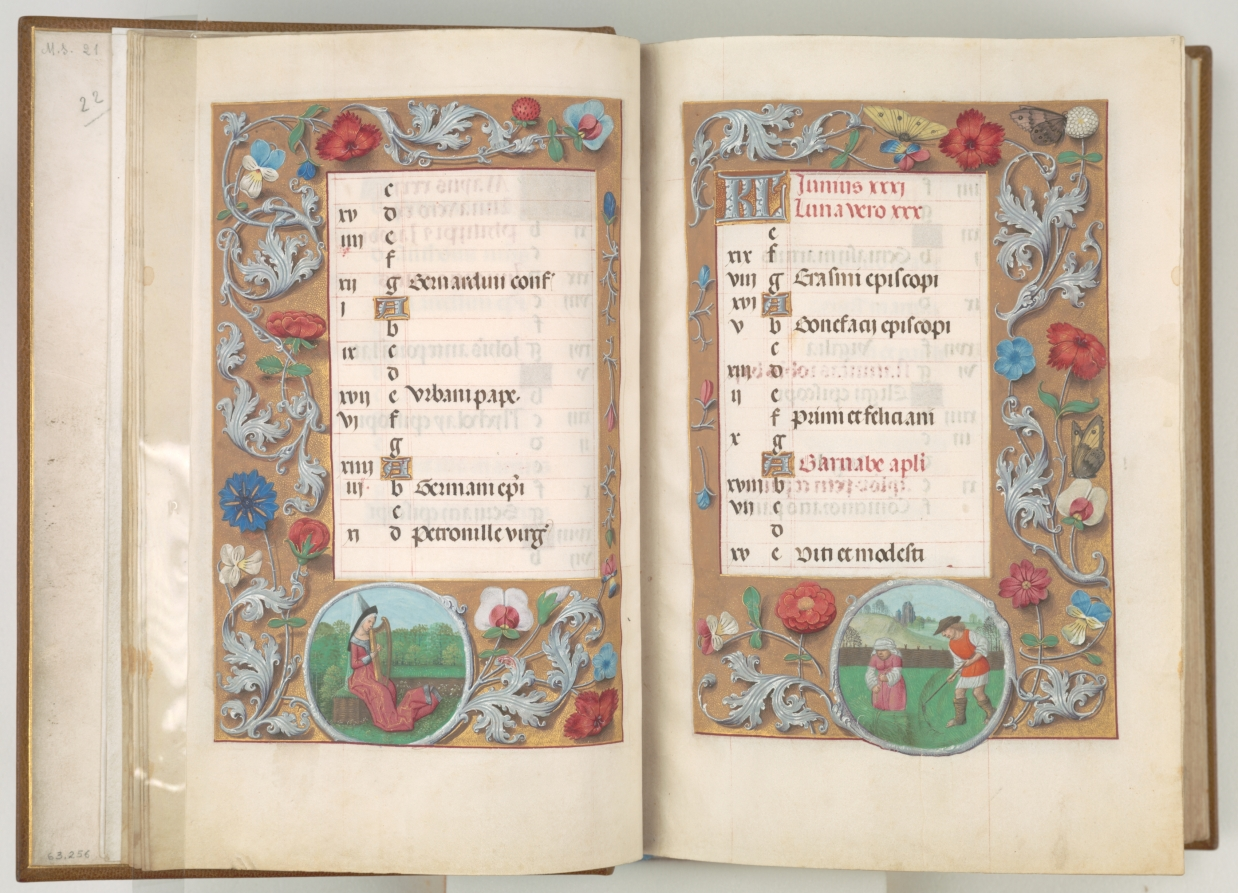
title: Hours of Queen Isabella the Catholic, Queen of Spain: Fol. 7r, June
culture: Flanders, Ghent and Bruges, late 15th century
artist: Master of the First Prayerbook of Maximillian (Flemish, c. 1444–1519)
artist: and Associates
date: c. 1500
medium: ink, tempera, and gold on vellum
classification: Bound Volume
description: A great lover of Flemish art, Queen Isabella treasured her many devotional books. This deluxe manuscript was created for her private devotions by highly organized and distinctly talented manuscript painters active in Ghent and Bruges. The Ghent-Bruges school represents the culmination of Flemish book painting, whose main features were the use of rich colors, illusionistic effects, a love of landscape, and a strong sense of visual narrative. Manuscripts produced by this circle of artists are renowned for their border decoration featuring a rich variety of realistically painted flowers, scrolling acanthus leaves, birds, and butterflies.